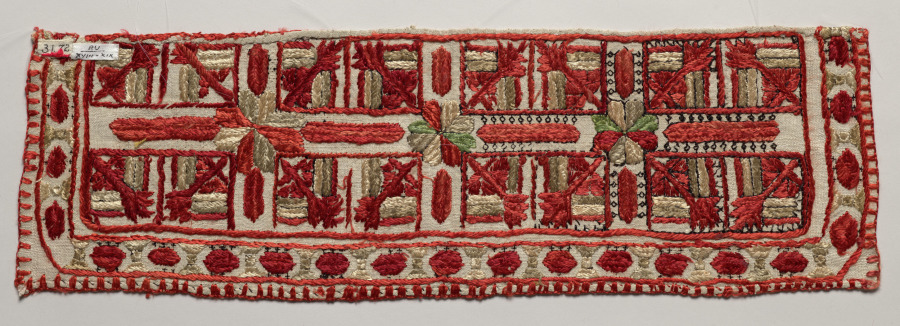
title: Panel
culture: Russia, Tambov province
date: c. 1780–1840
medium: Linen: plain weave; silk; embroidery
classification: Embroidery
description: This Russian embroidered panel was likely used to embellish the end of a bathing towel. Textiles of this type are valuable for their fine embroidery of ancient folk motifs, ritual significance, exemplification of the role of textiles in their society, and in this case, connection to a prominent woman collector, Natalia de Shabelsky, without whom this textile and others like it might have been lost.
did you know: Embroidering the ends of everyday towels was a common folk tradition in many cultures because it displayed the skill of the mother or daughter who stitched them.